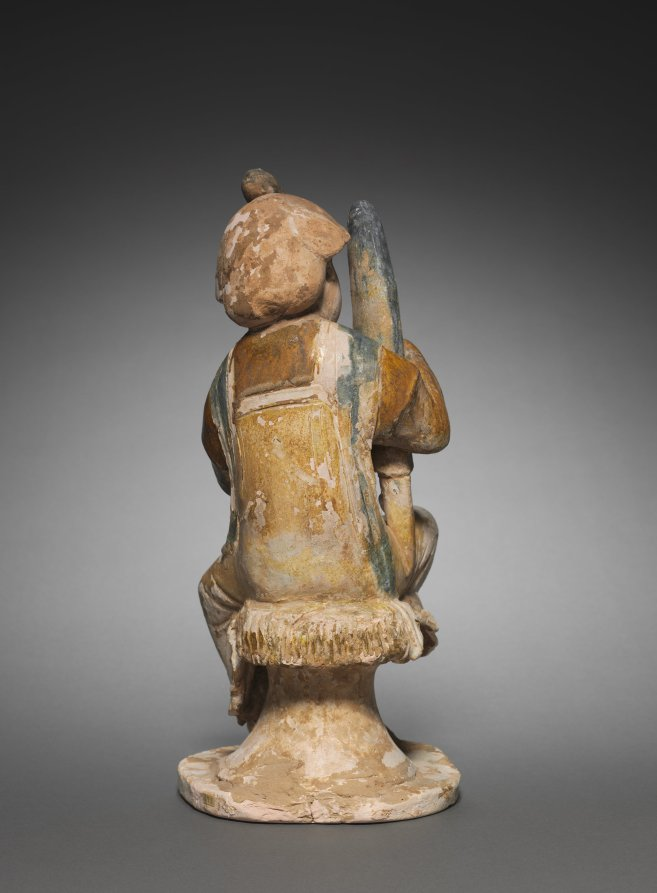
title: Harpist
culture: North China, Tang dynasty (618-907)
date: mid-700s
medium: glazed earthenware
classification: Sculpture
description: After four centuries of political turmoil and social disorder, a reunited China during the first half of the Tang Dynasty (618–906) was an age of unprecedented prosperity and vitality. Figurines placed in Tang tombs give a vivid glimpse of everyday life. The elegant earthenware ladies in various hairstyles, costumes, and activities suggest the fashions of the time. This lady musician is seated on a circular plinth, playing a harp balanced on her right thigh. The plump face has well-defined features, with straight nose, pursed lips, and round cheeks. Her hair is drawn into a coiled chignon over the forehead. A long, high-waisted robe flows down to her shoes' upturned tips.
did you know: The angular harp, like the one held by this musician, occupied a prominent position in the court orchestras by the mid-eighth century.